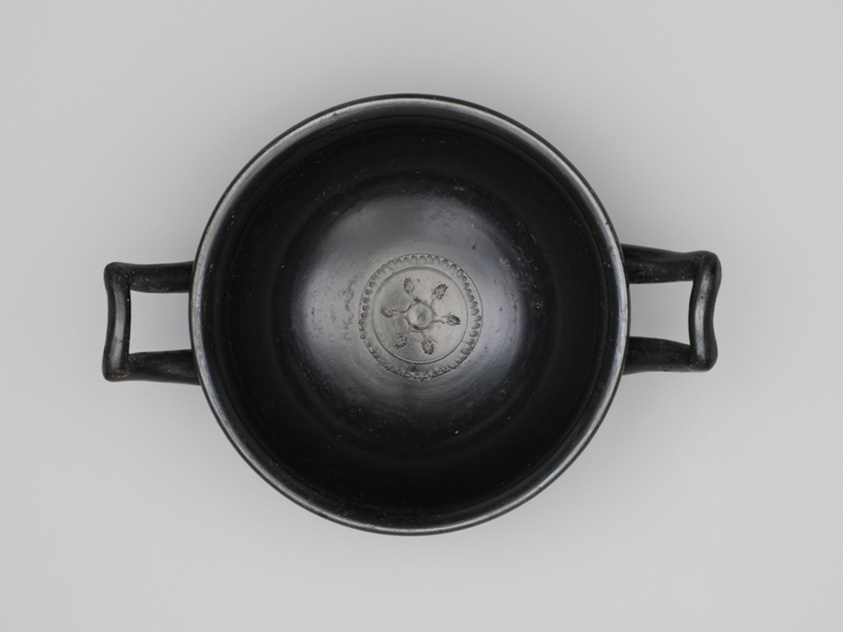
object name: Vessel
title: Skyphos (Drinking Cup)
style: greek, ancient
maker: Greek; Athens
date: 410-400 BCE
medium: terracotta, black-glaze with impressed decoration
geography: Cales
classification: drinking vessel; ceramics; vessel; ancient art